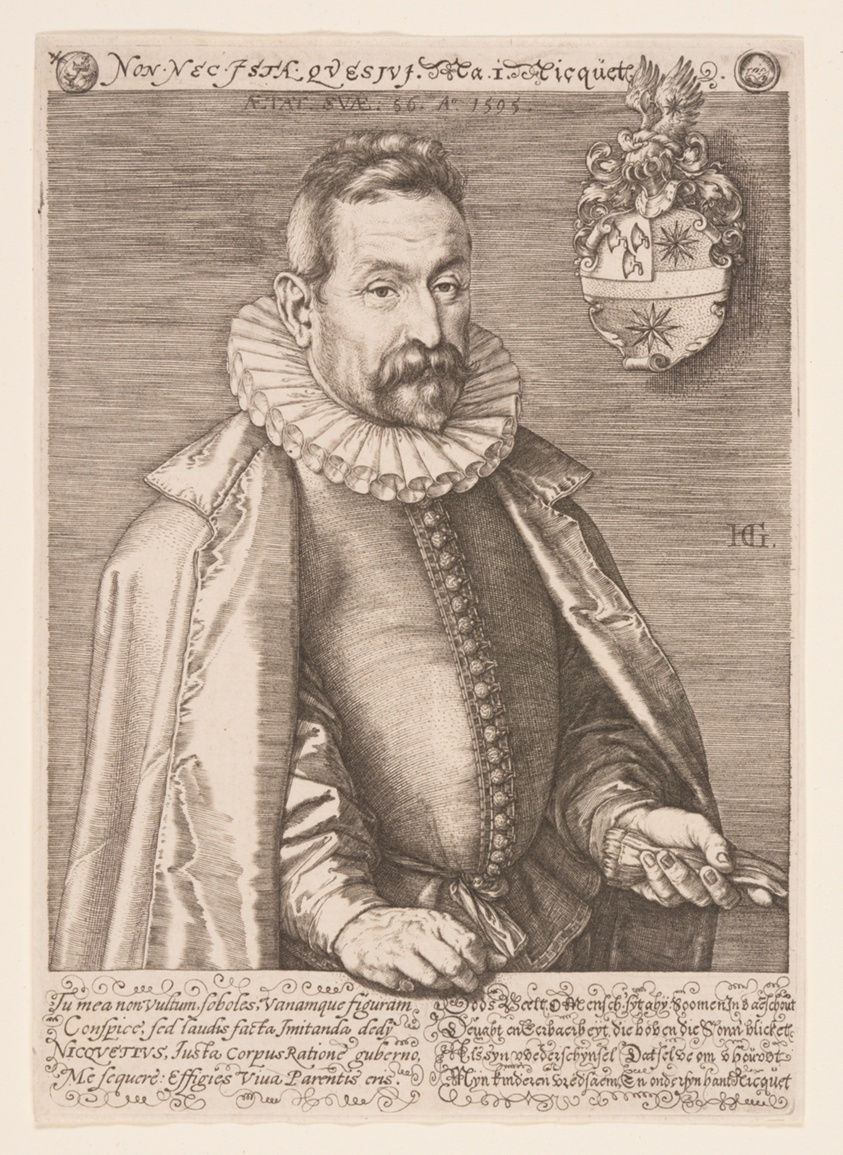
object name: Print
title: Jan Nicquet, Art Collector in Amsterdam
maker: Hendrick Goltzius (Dutch, 1558–1617)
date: 1595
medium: Engraving on laid paper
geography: Netherlands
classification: engraving; paper; print; prints and drawing